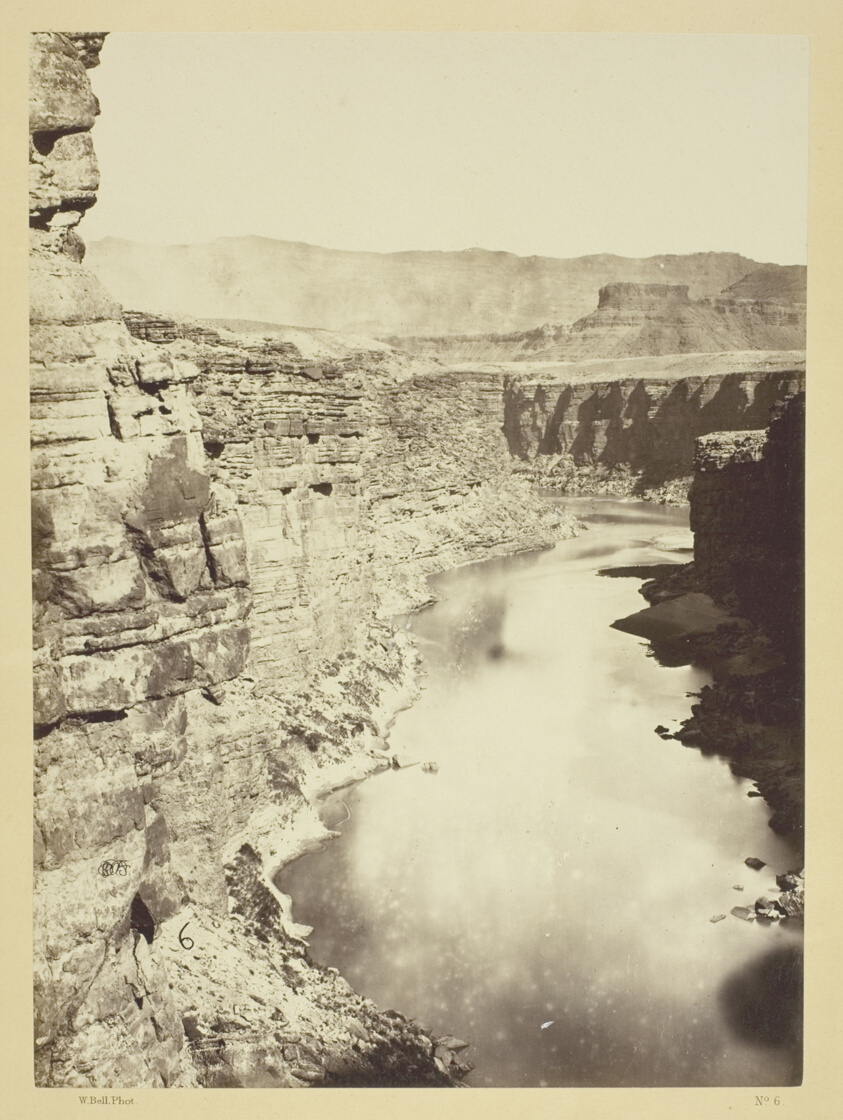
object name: Photograph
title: Grand Canon, Colorado River, Near Paria Creek, Looking West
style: 19th century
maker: William H. Bell (American, 1830–1910)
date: 1872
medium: Albumen print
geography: United States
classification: albumen print from collodion negative; photograph; photography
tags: Collected by Hugh Edwards